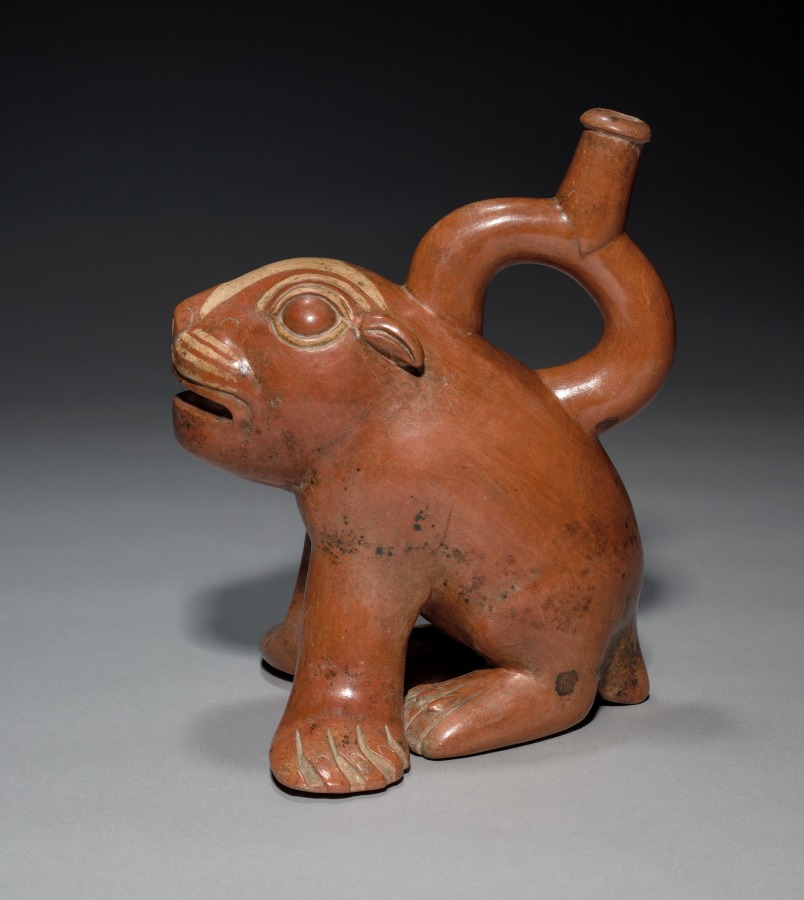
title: Sea Lion Pup Vessel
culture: Central Andes, North Coast, Moche people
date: 200–850 CE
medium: ceramic and slip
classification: Ceramic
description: Sea lions commonly appear in Moche art as effigy vessels, like this appealing pup, or in complex scenes that often show them as the targets of human hunters. They may have been prized in part for the beach pebbles found in their stomachs; modern Peruvian folk healers consider such pebbles to have powerful medicinal qualities. Also, colonial-period natives believed that sea lions carried the dead to off-shore islands, an idea that could date to Moche times.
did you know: Moche potters were skilled at producing charming images using only red and white slip.